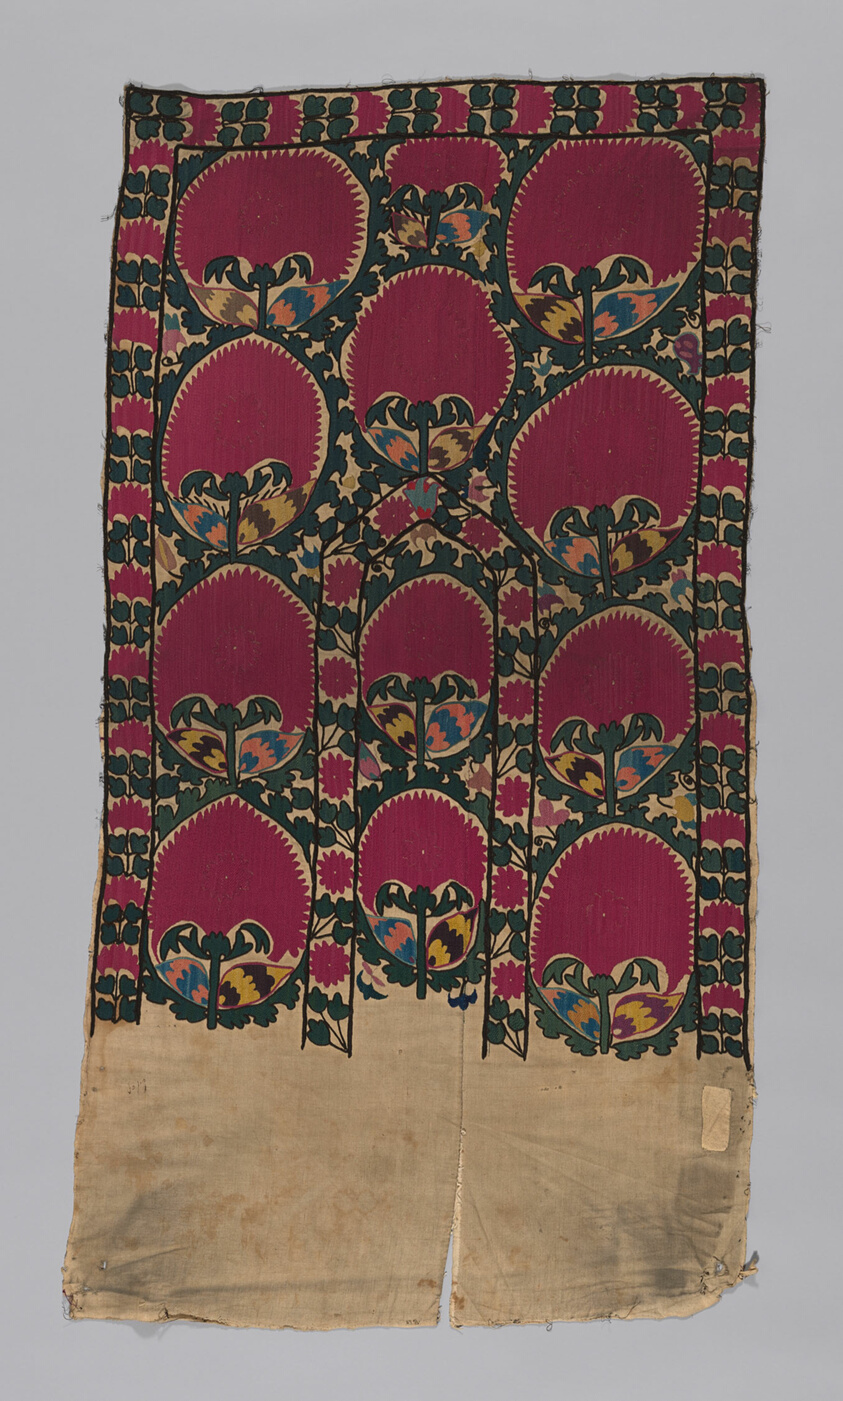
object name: Textile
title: Panel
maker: Uzbekistan, Bukhara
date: 19th century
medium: linen embroidered with multicolor silk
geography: Uzbekistan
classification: textile; needlework (visual works)